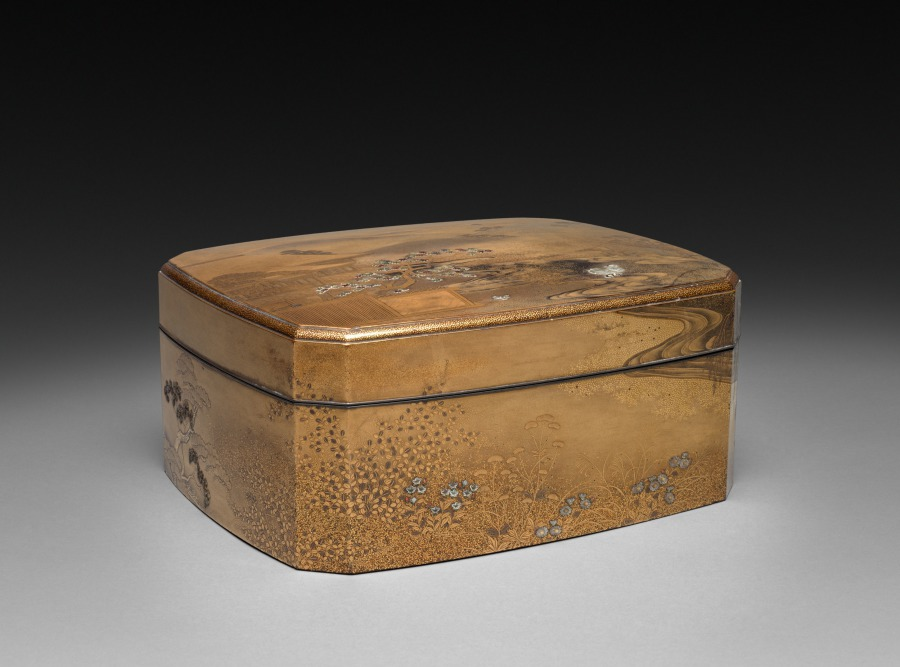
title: Box with Landscape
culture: Japan, Edo period (1615–1868) to Meiji period (1868–1912)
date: 1800s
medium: lacquer with sprinkled gold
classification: Lacquer